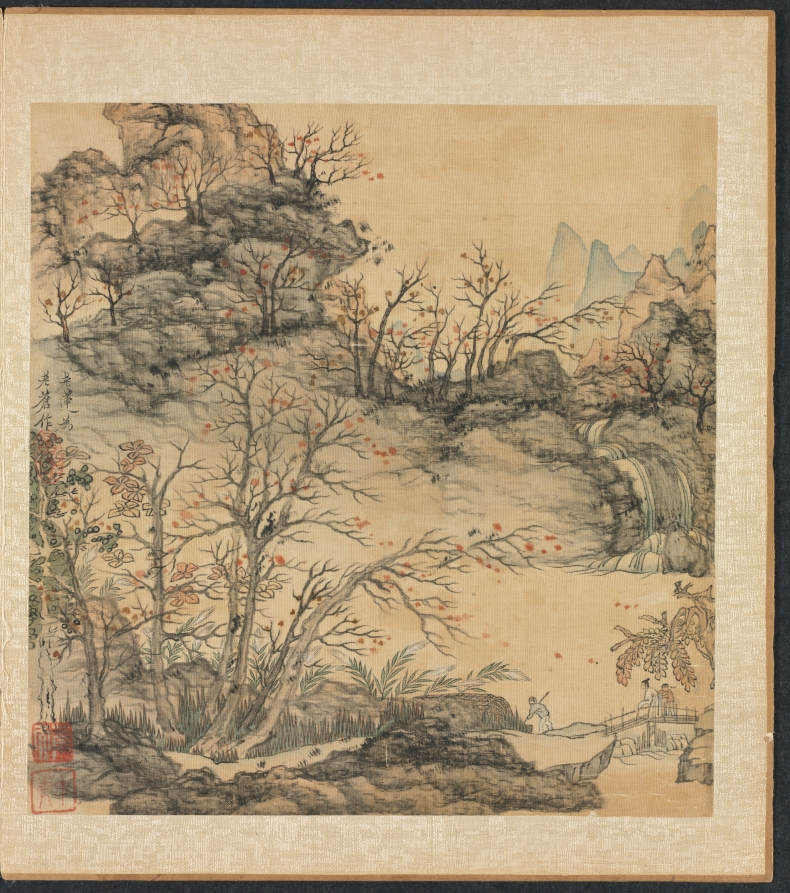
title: Paintings after Ancient Masters: Autumn Landscape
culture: China, Ming dynasty (1368–1644)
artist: Chen Hongshou (Chinese, 1598/99–1652)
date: 1598–1652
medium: album leaf; ink and color on silk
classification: Painting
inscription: Lao-lien painted for Lao-ts'ang. [Seal] Chang-hou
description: The twenty paintings in this double album by Chen Hongshou include landscapes, figures, and flowers. It also has one leaf featuring a woman, an often-used subject not found in the other albums from the latter part of his career. His late works are wonderful summations of Chen's peculiar and quirky art—archaistic, hyper-refined—but without accompanying shallowness or sentimentality. His figures and landscapes in the late albums are miniaturized, not unlike the small Chinese gardens, or the carefully selected small table rocks or old roots used for contemplation to see the world in miniature. This loss of scale is quite deliberate and reflects the psychological situation of a depressed class like the Ming loyalist officials and scholars, deprived of their integrity and honor, and forced to lead a diminished and restricted existence.